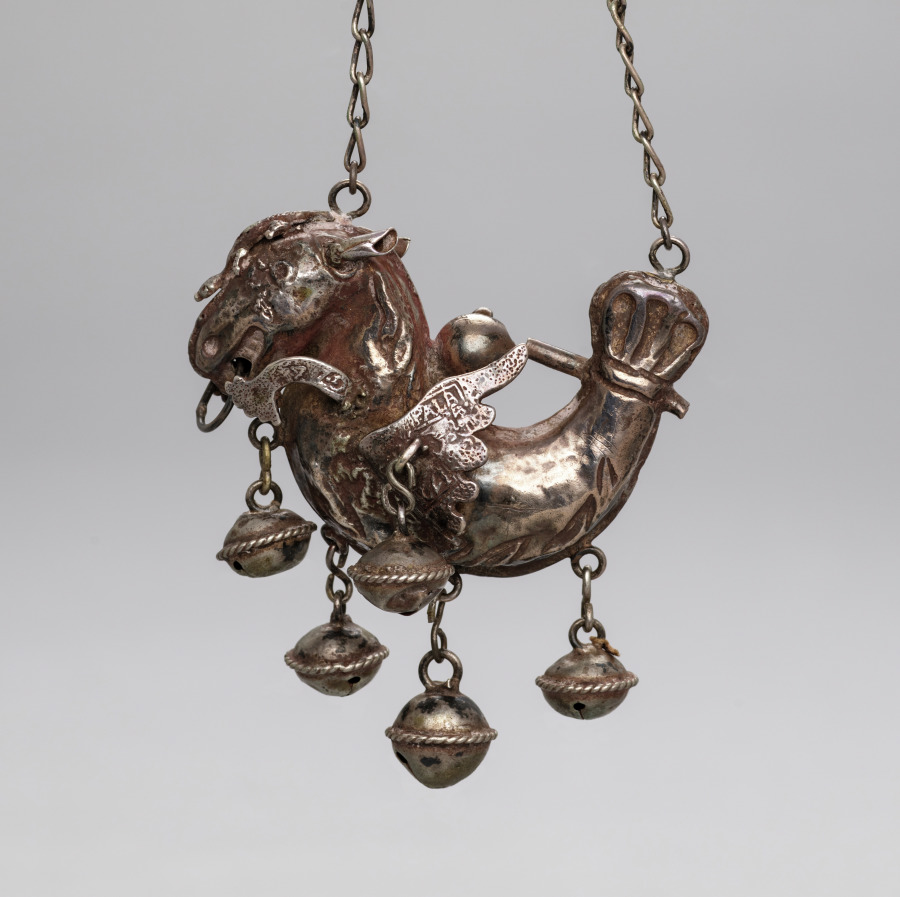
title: Rattle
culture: Italy, Sicily, 18th century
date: 1700s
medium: silver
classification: Silver